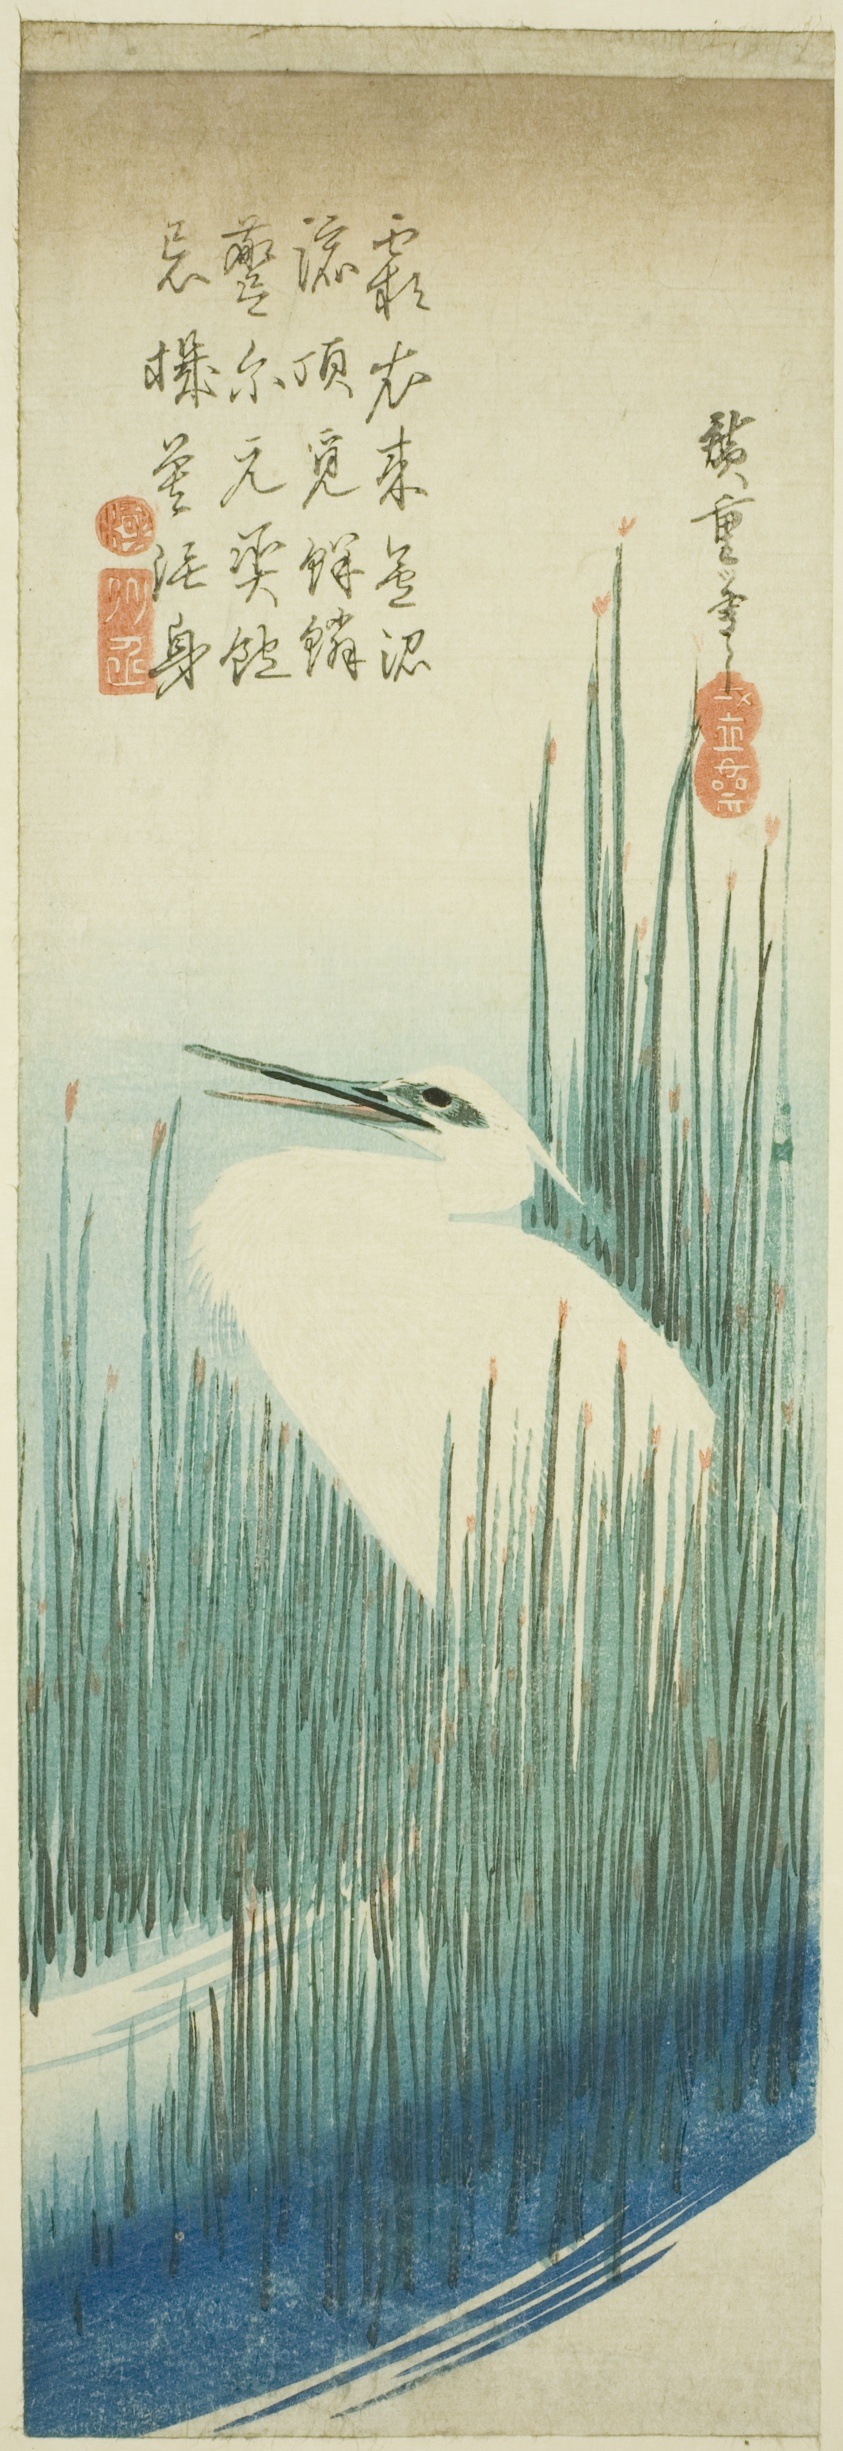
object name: Print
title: White heron and brushes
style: Japanese (culture or style)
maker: Utagawa Hiroshige 歌川 広重; Japanese, 1797-1858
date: 1830s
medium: Color woodblock print; chutanzaku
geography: Japan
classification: woodblock print; print; asian art